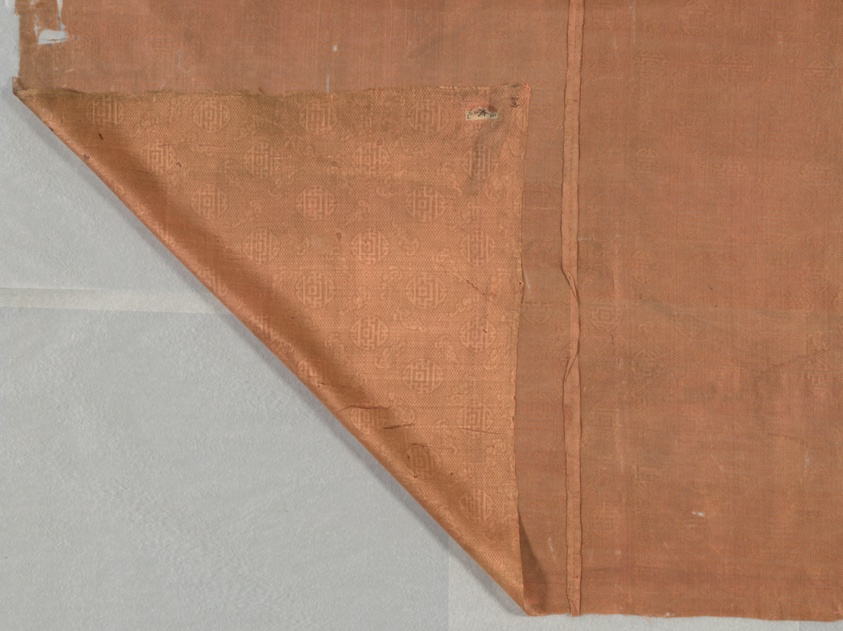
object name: Textile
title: lining for panel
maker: China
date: Qing dynasty (1644–1911), 1820/30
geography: China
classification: textile